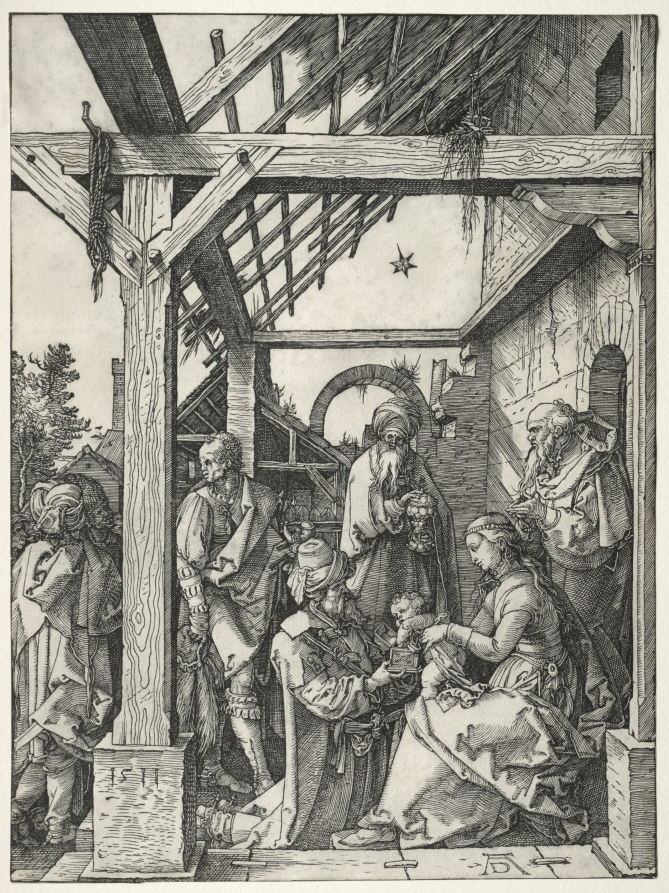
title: The Adoration of the Magi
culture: Germany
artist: Albrecht Dürer (German, 1471–1528)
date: 1511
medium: woodcut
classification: Print